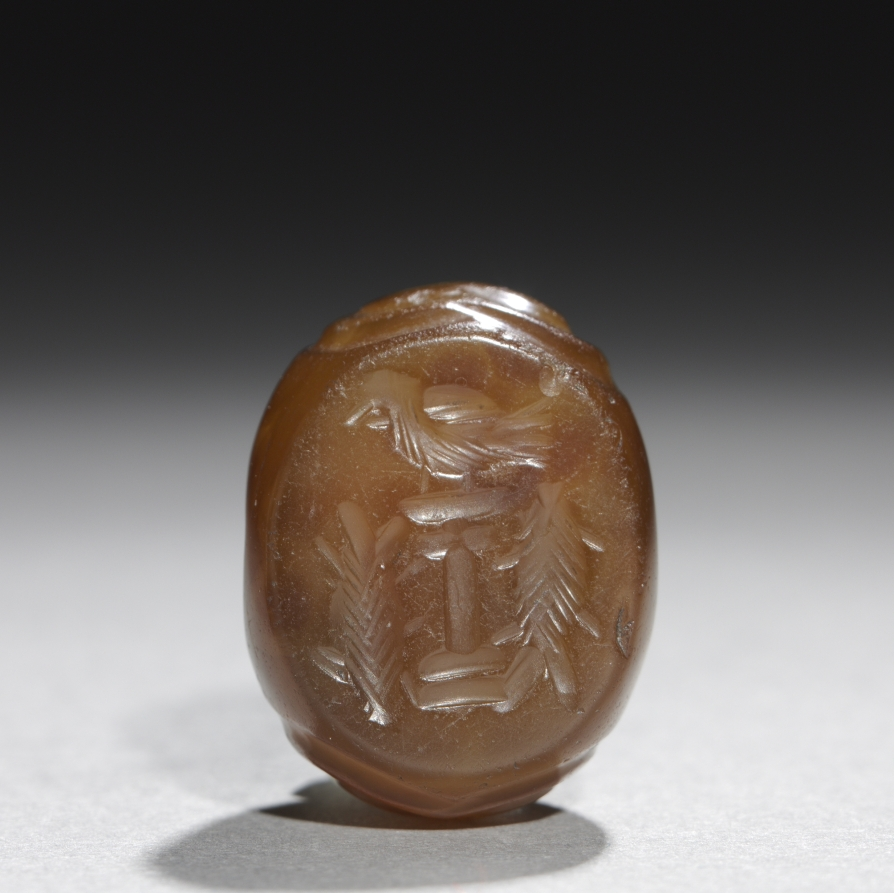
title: Fire Altar Intaglio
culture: Iran, Sasanian Empire (224–651 CE), reign of Hormizd II (303–309)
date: c. 400 CE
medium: chalcedony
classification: Glyptic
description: A Zoroastrian fire altar is carved into this chalcedony intaglio, consisting of a pedestal, pillar, and bowl for an eternal flame. A bird perches above the altar bowl and fish flank the pedestal. A carved star decorates the backside. A pierced hole through the gemstone suggests it once hung on a cord around a neck or wrist. Although the fire altar is a Zoroastrian religious symbol, birds and fish also occur in Christian iconography.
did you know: Seal stones served as signatures and seals for documents.